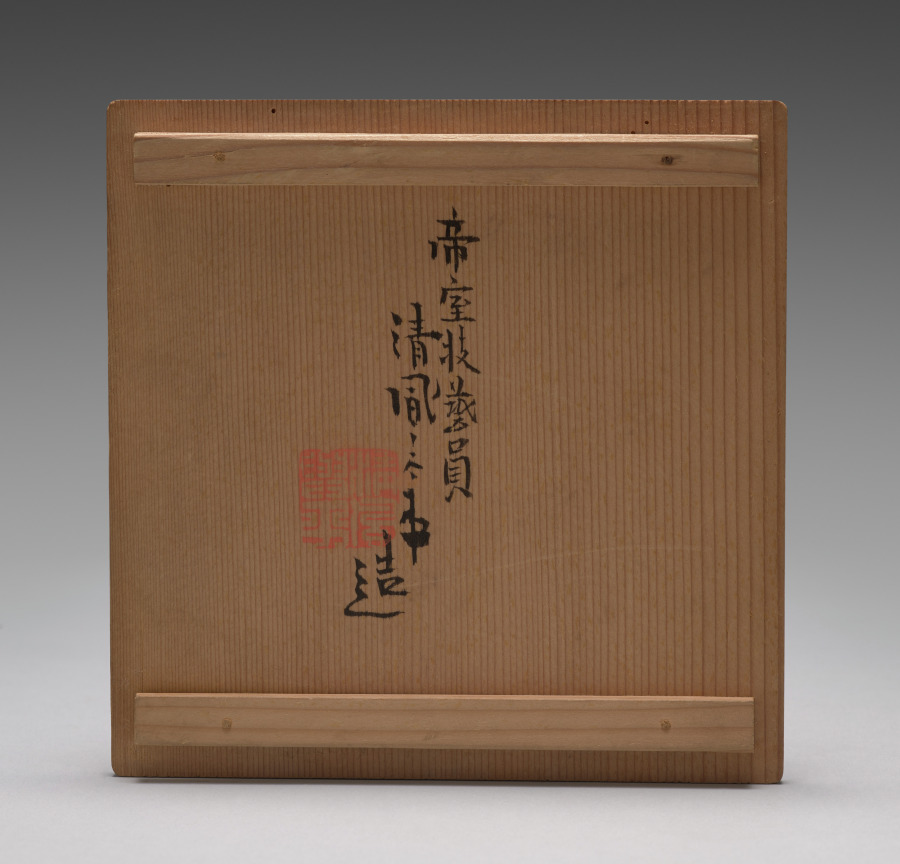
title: Brazier with Coins Motif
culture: Japan, Meiji period (1868–1912)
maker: Seifū Yohei III (Japanese, 1851–1914)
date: 1893–1914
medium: Stoneware with underglaze iron oxide designs and crackling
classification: Ceramic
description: Tall pottery braziers called ryōro are often used to heat the water for the tea served at sencha gatherings. This one sits on three sturdy legs, one of which bears the artist’s seal on its face. A horizontal rectilinear opening above this leg allows air to circulate into the lower part of the brazier. The top part is outfitted with three prongs onto which the kettle can be lowered; below them is a basin, perforated with circular holes, that holds the charcoal fuel. The brazier is decorated under the crackled transparent glaze with a design of old coins in iron oxide. The motif is cleverly chosen, for most older coins are round with a central hole, often square, which echoes the cylindrical form of the brazier with its rectilinear “wind gate,” or fūmon.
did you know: One coin is painted with the Japanese god of wealth, Daikokuten, standing upon two bales of rice.